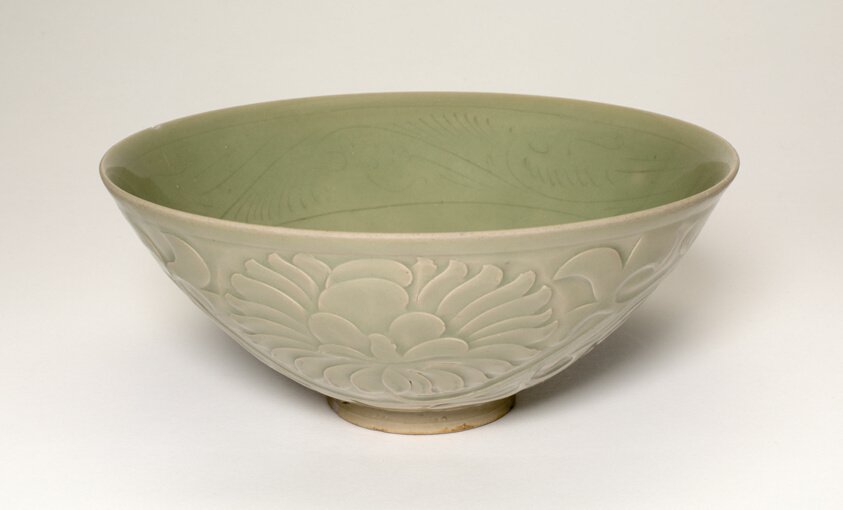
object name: Vessel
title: Conical Bowl with Peony Scroll and Leaves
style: Chinese (culture or style)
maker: China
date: Five Dynasties/Northern Song dynasty, 10th/11th century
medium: Yaozhou ware; celadon-glazed stoneware with underglaze carved (exterior) and incised (interior) decoration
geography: China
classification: bowl; stoneware; dish (vessel); ceramics; asian art; vessel